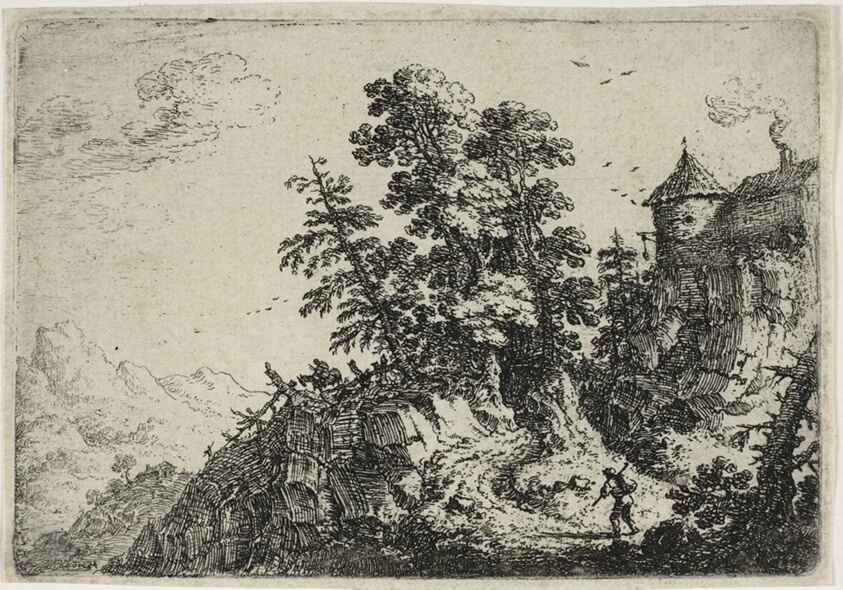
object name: Print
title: Travellers on Winding Road, from Six Landscapes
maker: Herman Saftleven II; Dutch, 1609-1685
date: 1640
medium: Etching on paper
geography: Holland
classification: print; prints and drawing